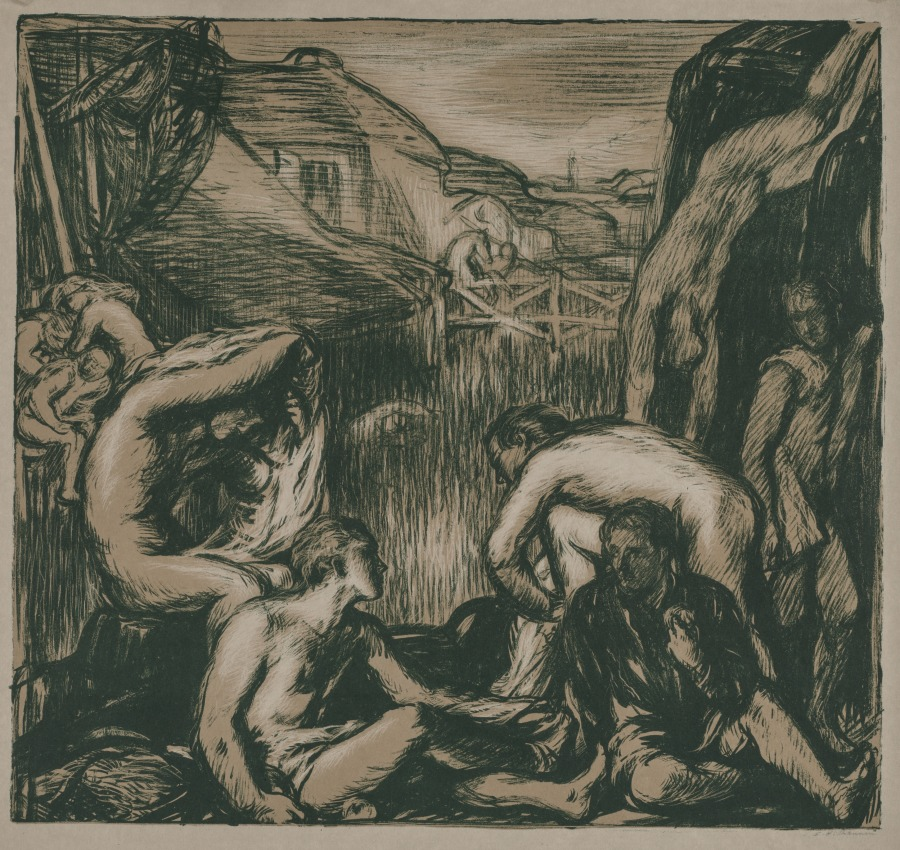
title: The Mill-Pond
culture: England, early 20th Century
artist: Charles Hasslewood Shannon (British, 1863–1937)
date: 1905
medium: color lithograph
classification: Print